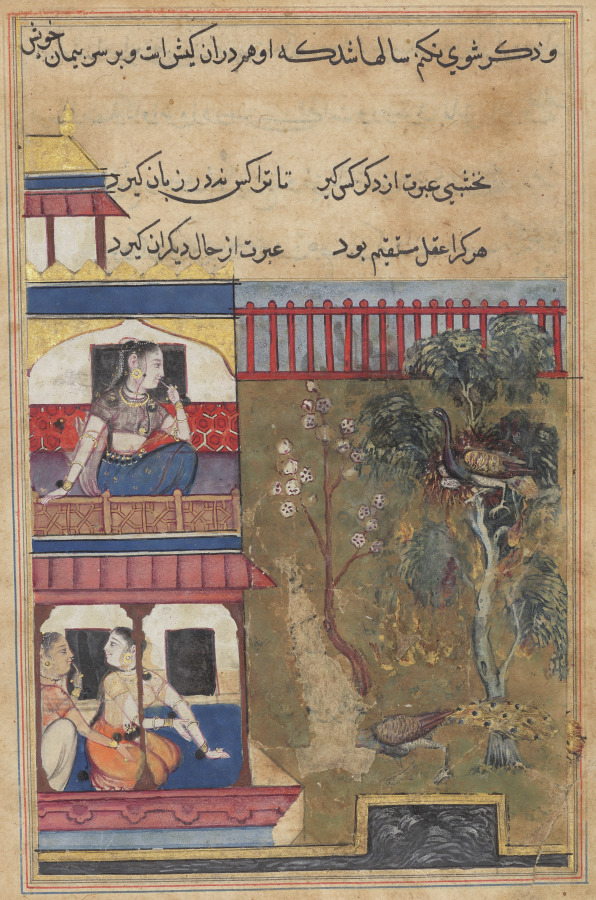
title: The queen of Rum watches the peahen prefer to burn rather than abandon her eggs while the peacock flees the nest, from a Tuti-nama (Tales of a Parrot): Thirty-ninth Night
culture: Mughal India, court of Akbar (reigned 1556–1605)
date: c. 1560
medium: gum tempera, ink, and gold on paper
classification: Painting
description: The queen of Rum sits in the upper balcony of her palace watching the fire in her garden with shock. Two female attendants observe the action from the room below. The cowardliness of the peacock in the face of danger convinced the queen of the disloyalty of men. As a result, she vowed to never marry.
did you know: Rum is the Arabic name of Rome and once designated the Byzantine Empire.